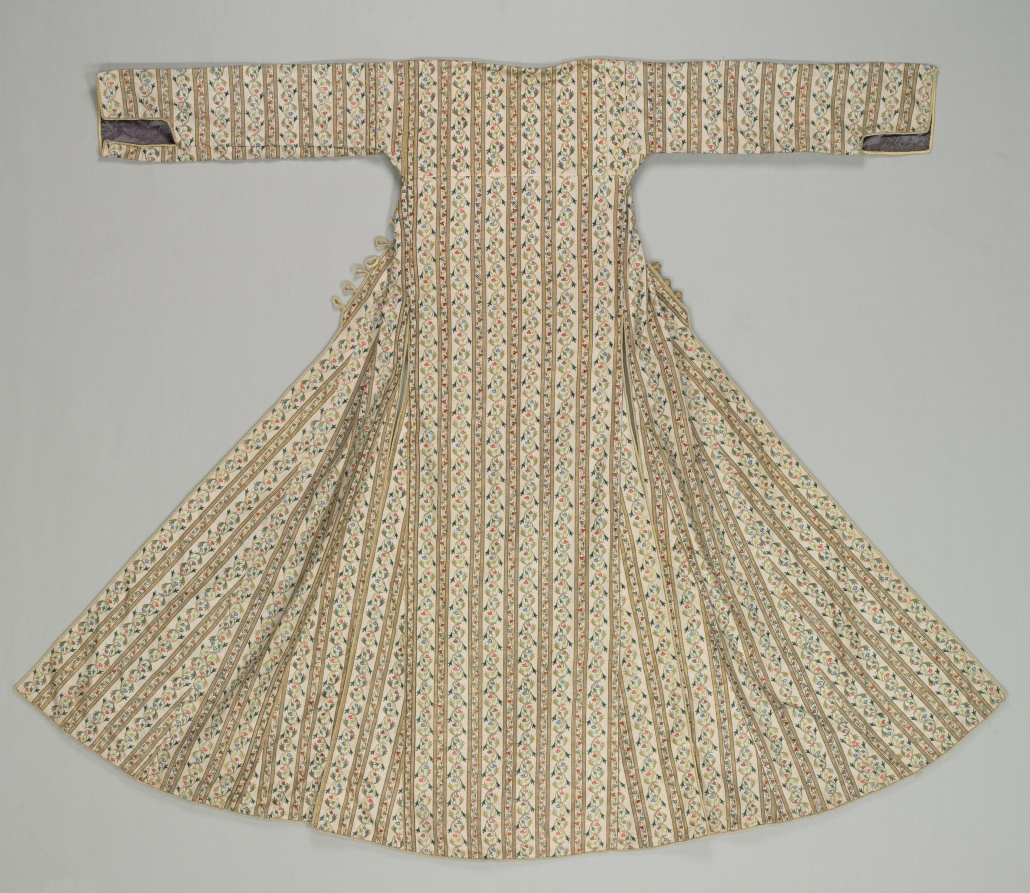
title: Woman's robe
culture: Turkey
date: 1800s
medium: striped fabric; plain weave: silk; embroidery, chain stitch: silk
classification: Garment